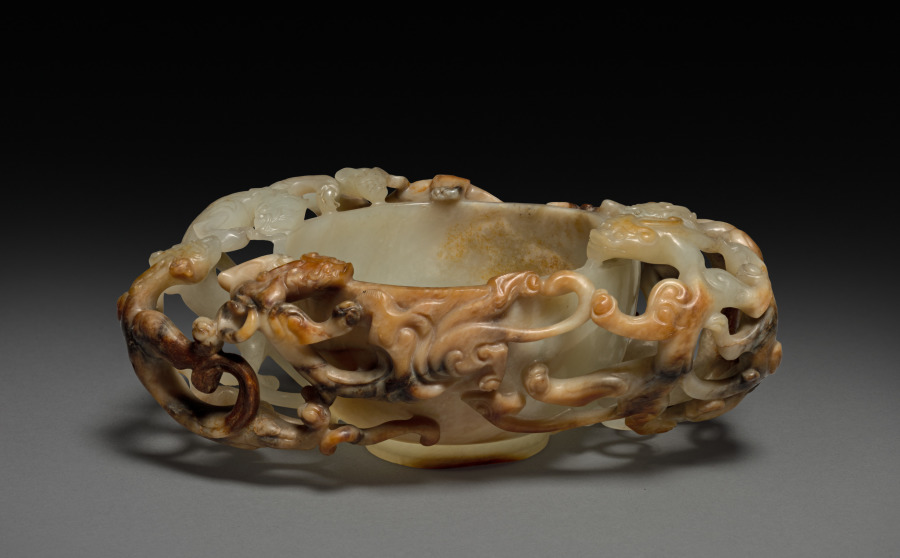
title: Cup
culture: China, Qing dynasty (1644–1911), Qianlong reign (1736–95)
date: 1736–95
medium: jade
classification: Jade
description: In the Qing dynasty, luxury items became more affordable to larger parts of the society, including women, merchants, and literati in nonofficial positions. Imperial patronage and a growing urban population also encouraged consumption of luxury goods and local craftmanship. This cup with open-work interlacing dragons shows the creative mind of the skilled artisan who carved it from a round piece of jade.